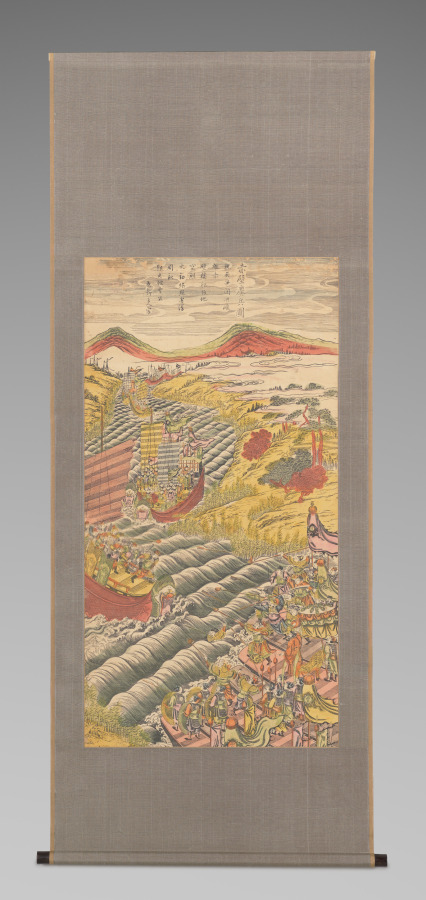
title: The Fierce Battle of Red Cliff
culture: China, Qing dynasty (1644–1911), Qianlong period (1736–95)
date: 1736–95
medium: Hanging scroll; polychrome woodblock print; ink and color on paper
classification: Print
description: In the 1600s, printing flourished in such Jiangnan cities as Nanjing, Suzhou, Hangzhou, and Huizhou, evolving from privately enjoyed illustrated books printed in color to more commercialized single-sheet color prints that were hung on walls and became part of the rich urban visual culture.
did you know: Woodblock printing in color reached a height in China in the 1600s to 1700s. The prints were executed by means of sets of separate blocks, each carved to print a different color.